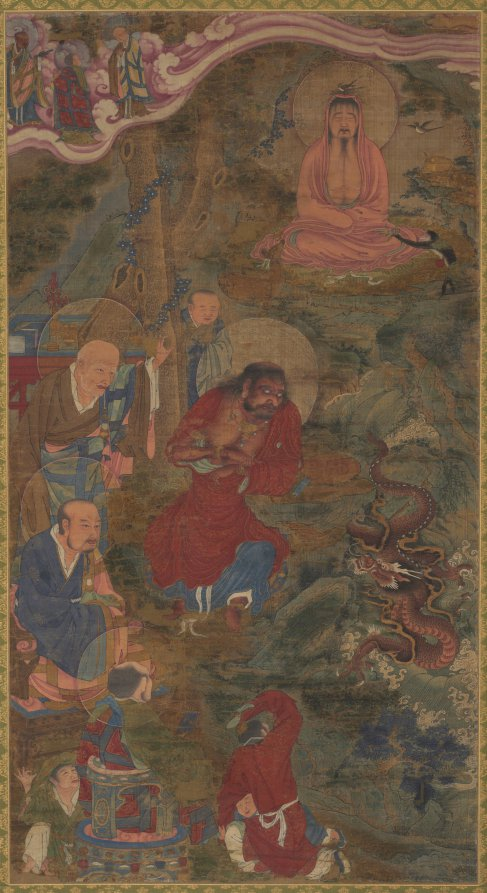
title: Miracle of the Dragon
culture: China, Ming dynasty (1368–1644)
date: 1600s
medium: Hanging scroll; ink, color, and gold on silk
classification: Painting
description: Buddhist disciples are grouped around a dragon in the lower right part of the scroll. The figures' varying levels of composure at the miraculous appearance of the dragon indicates how far removed each figure is from worldly affairs. The lay people's body language expresses their surprise. In contrast, the historical Buddha, Shakyamuni, in the upper right has been seated in meditation for such a long time that birds have begun assembling twigs for a nest atop his head. His eyes remain closed, and his body still, unmoved by either the sudden materialization of the dragon or the proximity of the monkey, deer, and birds. Dragons have been part of Buddhist culture since antiquity; in Chinese Buddhism the dragon is often interpreted as a symbol of enlightenment.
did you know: The generous application of brilliant mineral pigments is still evident throughout this painting.